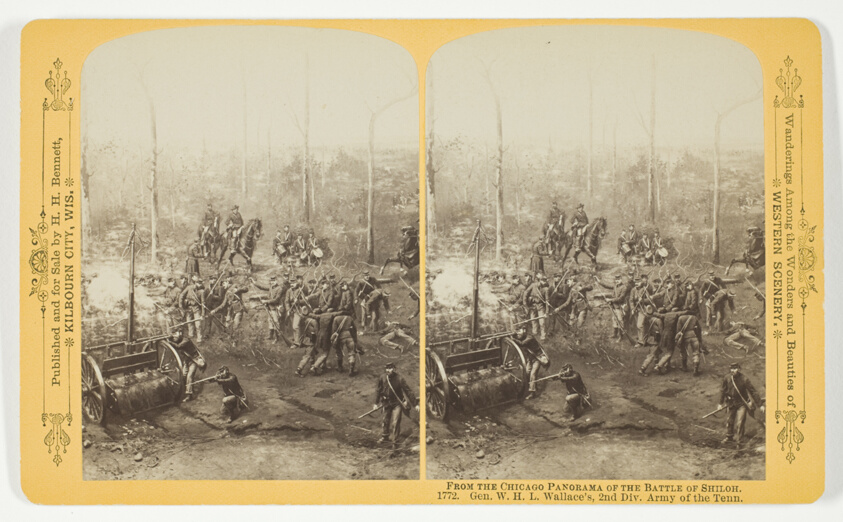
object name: Photograph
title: Gen. W.H.L. Wallace's, 2nd Div. Army of the Tenn., from the series "The Chicago Panorama of the Battle of Shiloh"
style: 19th century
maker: Henry Hamilton Bennett (American, born Canada, 1843-1908)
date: 1887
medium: Albumen print, stereo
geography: Chicago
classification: photography; photograph; albumen silver print; stereograph (albumen)